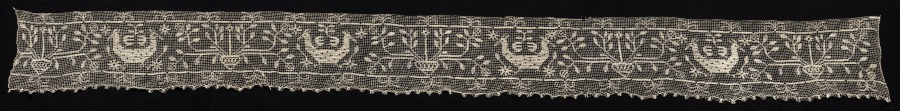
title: Border with Double-Headed Birds and Vases with Vines and Flowers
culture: Italy, Sardinia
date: 1800s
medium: Bleached linen (est.): needle lace, filet/lacis (knotted ground and darned in one direction)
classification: Lace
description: Double-headed birds alternating with flowering vases appear on this filet/lacis lace. The pattern repeats horizontally, with organic spirals which burst into the upper and lower registers.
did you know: This lace was given to the museum by Louise Tifft Brown, a native Clevelander who became an expert in lace while living in Venice for 35 years.